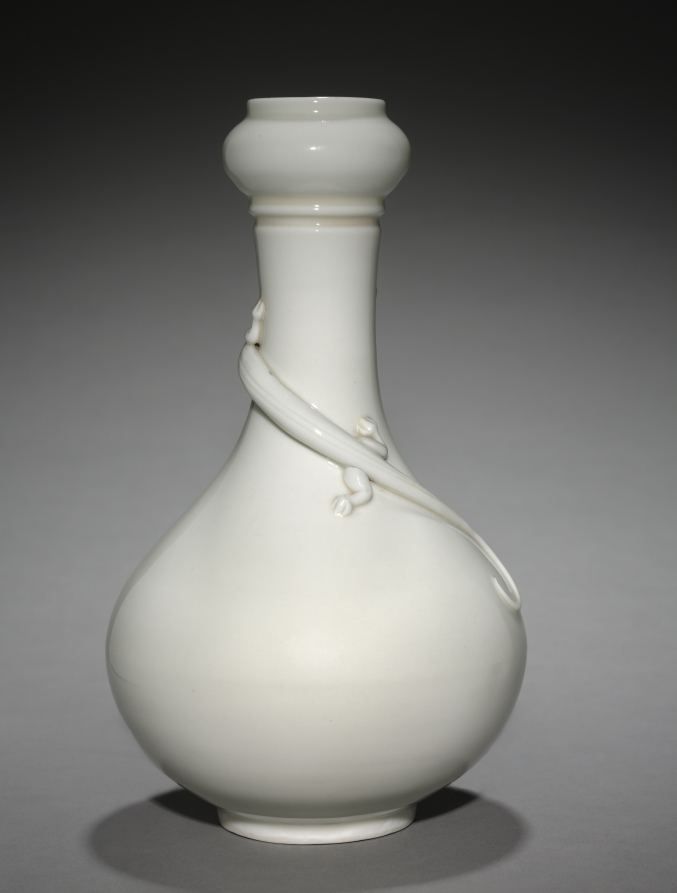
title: Bottle-shaped Vase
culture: China, Qing dynasty (1644-1911), Kangxi reign (1662-1722)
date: 1662–1722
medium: porcelain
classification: Ceramic